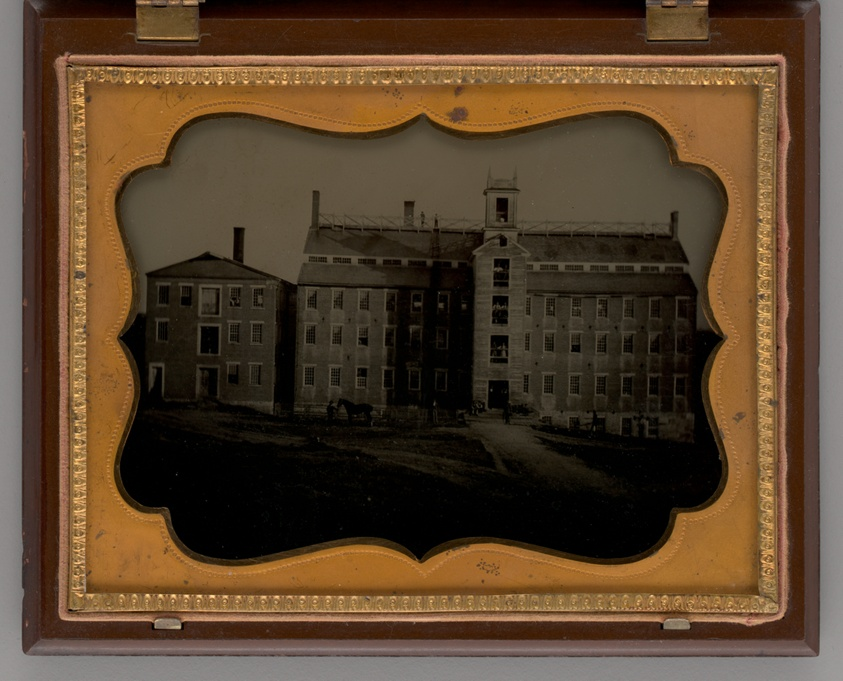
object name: Photograph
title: Untitled (Factory)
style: 19th century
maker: Unknown maker; American, 19th century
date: 1862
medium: Ambrotype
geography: United States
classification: photography; photograph; photographic process; ambrotype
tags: lundberg collection, industry, industrial landscapes, factory, buildings